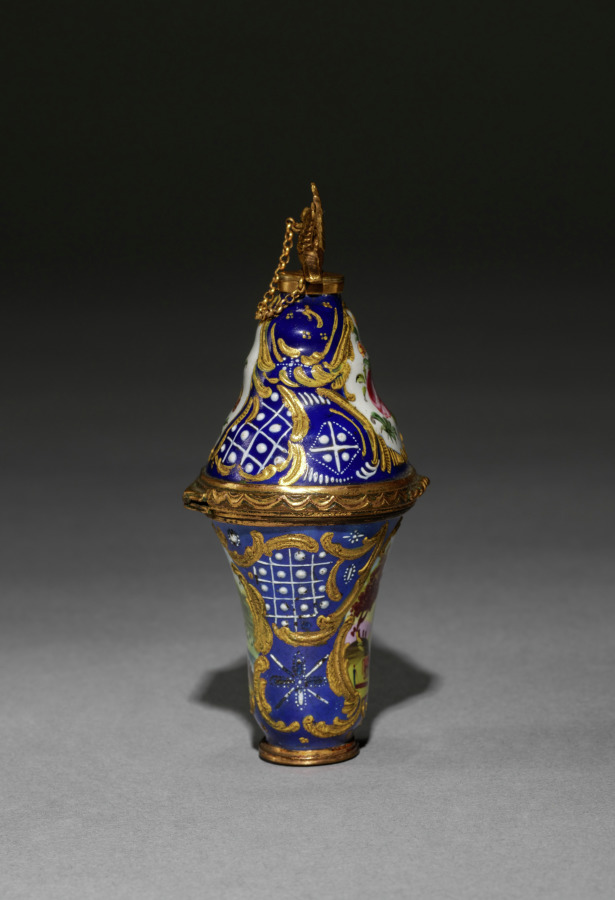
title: Scent Bottle and Box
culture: England, Staffordshire, 18th century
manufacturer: Staffordshire Factory (British)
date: 1750–1775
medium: enamel on copper with metal mounts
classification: Miscellaneous